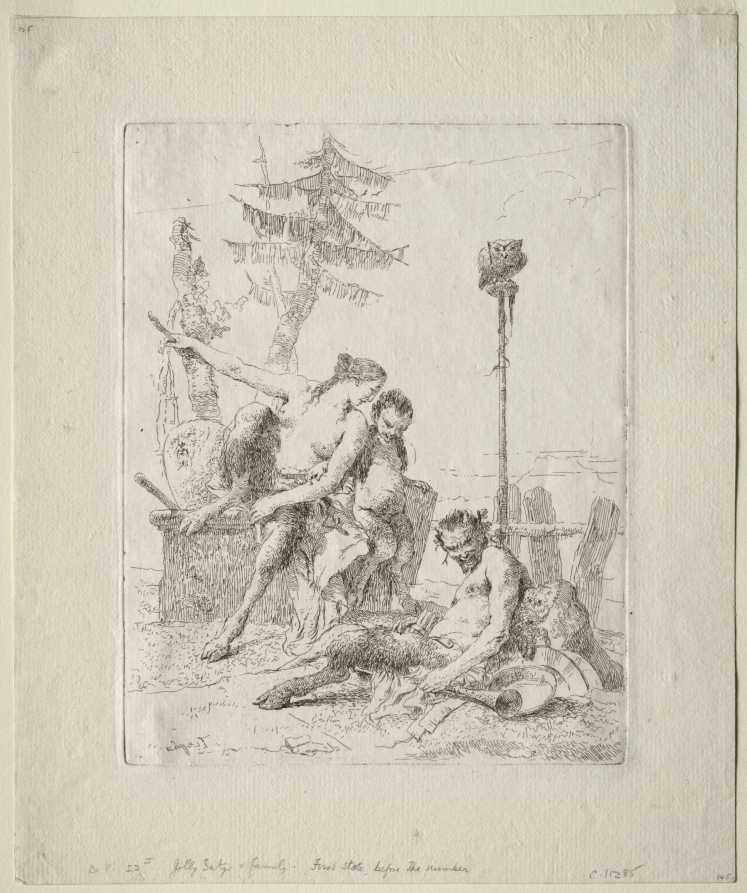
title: Scherzi di Fantasia: The Happy Satyr and his Family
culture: Italy, 18th century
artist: Giovanni Battista Tiepolo (Italian, 1696–1770)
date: 1750–60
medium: etching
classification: Print